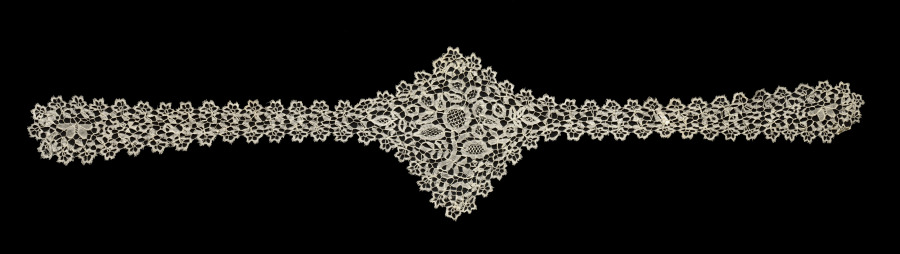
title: Lace Cap Square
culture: England, Honiton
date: 1800s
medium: Linen: bobbin lace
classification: Lace